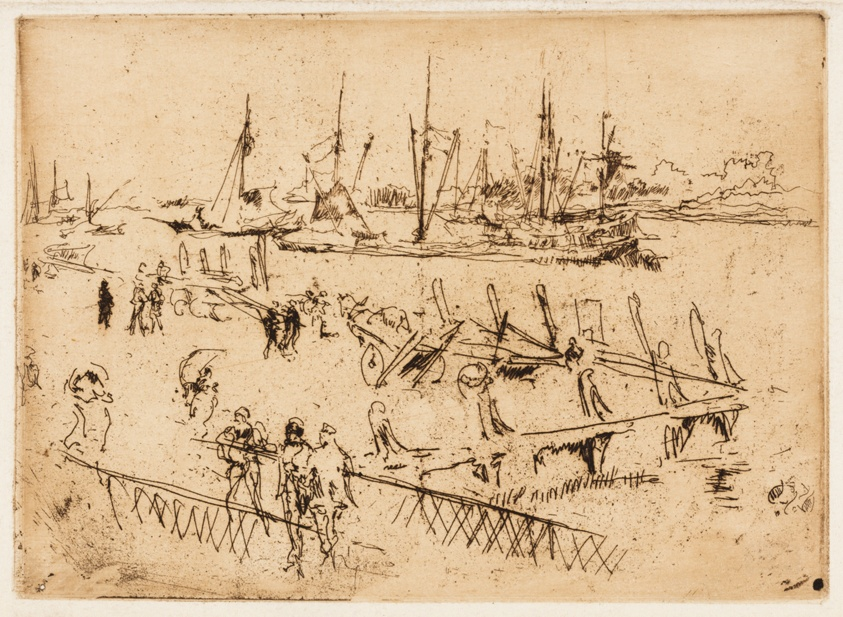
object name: Print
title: Little Dordrecht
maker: James McNeill Whistler (American, 1834-1903)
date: 1886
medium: Etching with foul biting in dark brown ink on off-white laid paper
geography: United States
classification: etching; foul biting; print; prints and drawing; paper